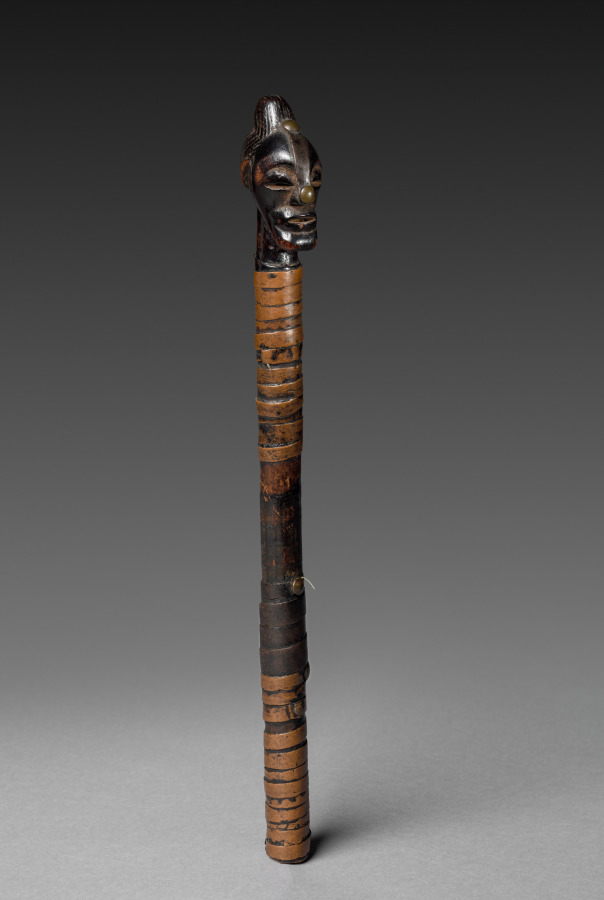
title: Fragment of a Staff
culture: Africa, Central Africa, Democratic Republic of the Congo, Kalundwe, unknown maker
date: late 1800s–early 1900s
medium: Wood, copper alloy, upholstery studs, and iron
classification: Implements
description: Though modest in scale and fragmentary in that its blade is missing, this is perhaps one of the finest surviving examples of a sculptural object in the little-known style of the Kalundwe people. It represents a poorly documented culture's artistic style that sits between the Songye to the west and the Luba to the east. Showing surface traces of continuous manipulation, the shaft of this short staff is entirely wrapped with a copper sheet, a common feature of rank emblems. Originally, it would have had an iron blade projecting from its mouth. However, rather than serving as a functional tool for carving, it would be hung over the shoulder to signal the high rank of its owner, be it a chief, another dignitary, or even a sculptor.